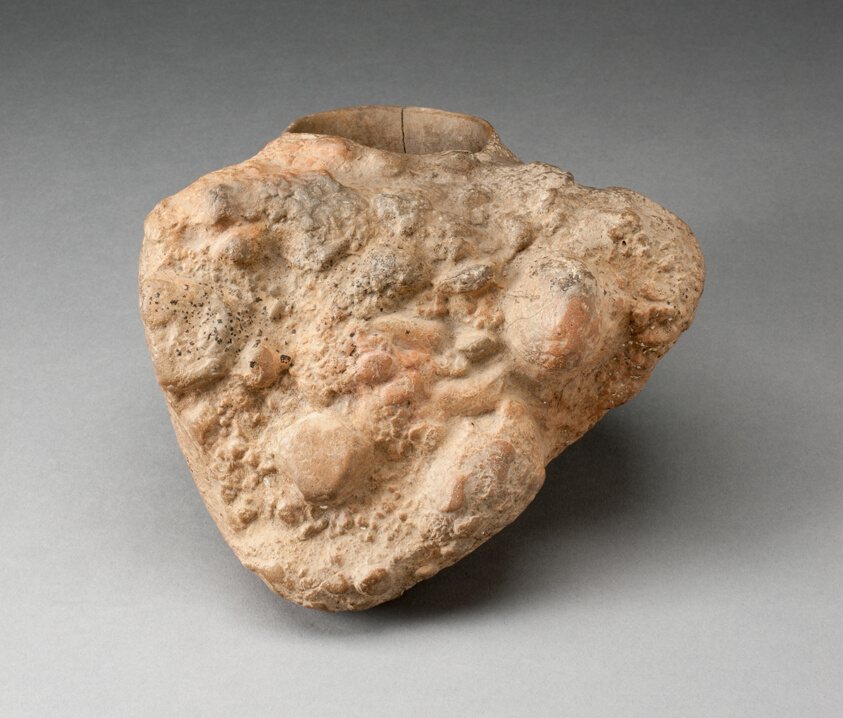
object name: Sculpture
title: Heart-Shaped Sculpture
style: veracruz, classic veracruz, mesoamerican, Pre-Columbian, americas, Arts of the Americas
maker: Classic Veracruz; Veracruz, Mexico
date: 100–1000 CE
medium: Ceramic and pigment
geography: Veracruz state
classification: earthenware; art of the americas; ceramics; sculpture